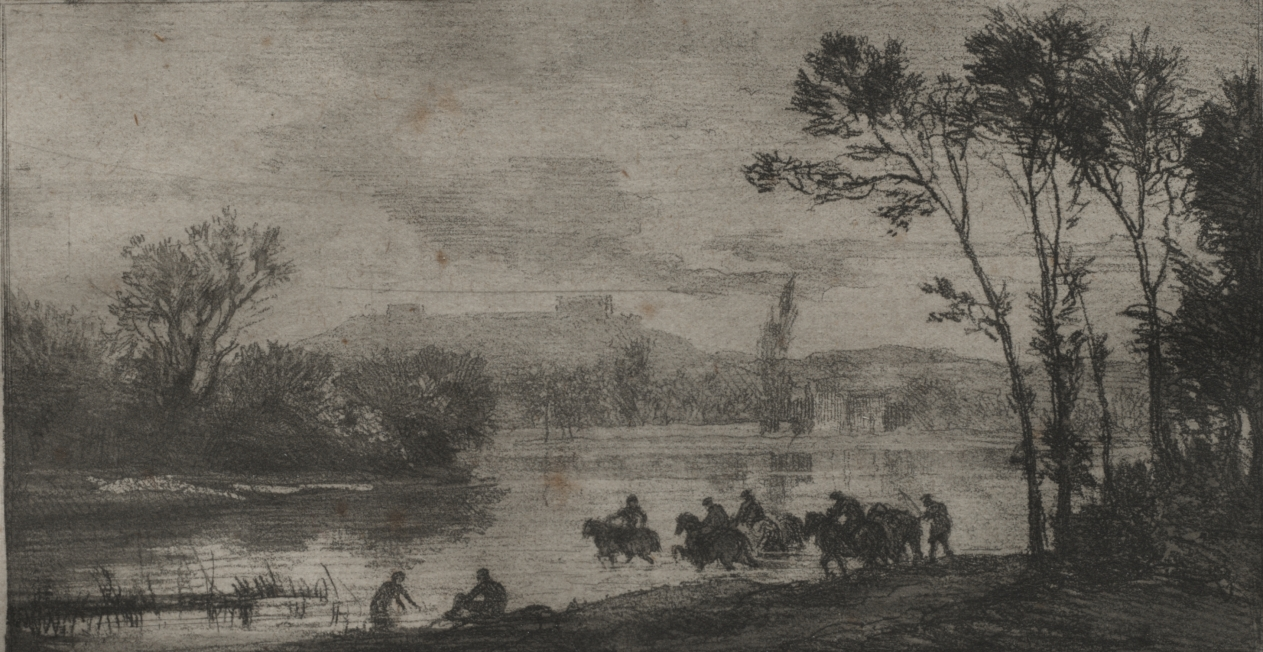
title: The Little Cavaliers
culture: France, 19th century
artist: Charles François Daubigny (French, 1817–1878)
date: 1844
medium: softground etching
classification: Print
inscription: signed, lower right, in plate: Daubigny et F. S.